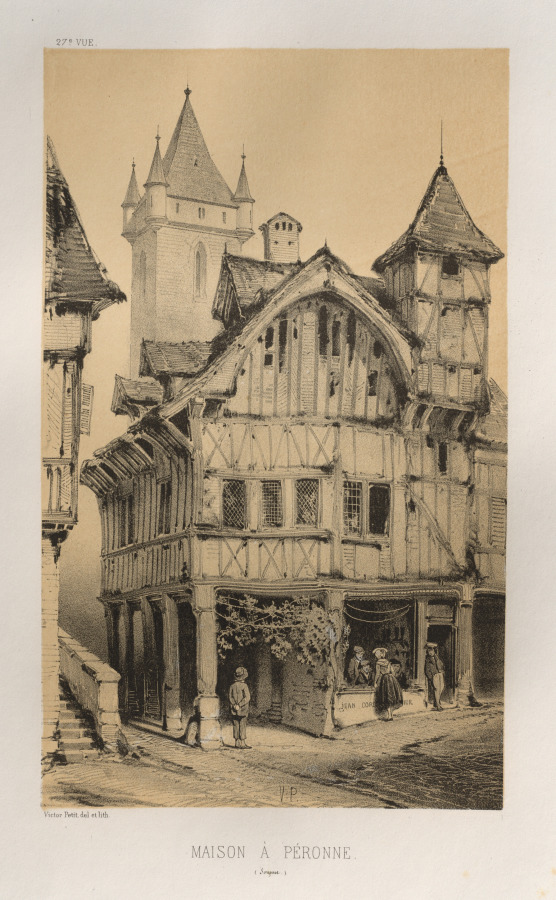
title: Architecture Pittoresque ou Monuments des xveme. Et xvieme. Siecles: Chateaux De France des XV et XVI Siecles: Pl. 27, Maison A Peronne (Somme)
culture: France, 19th century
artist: Victor Petit (French, 1817–1874)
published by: Charles Boivin (publisher and editor); Lith de Godard a Paris (printer)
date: published 1860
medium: lithograph with tint stone, from portfolio of 100 lithographs with tint stone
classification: Print